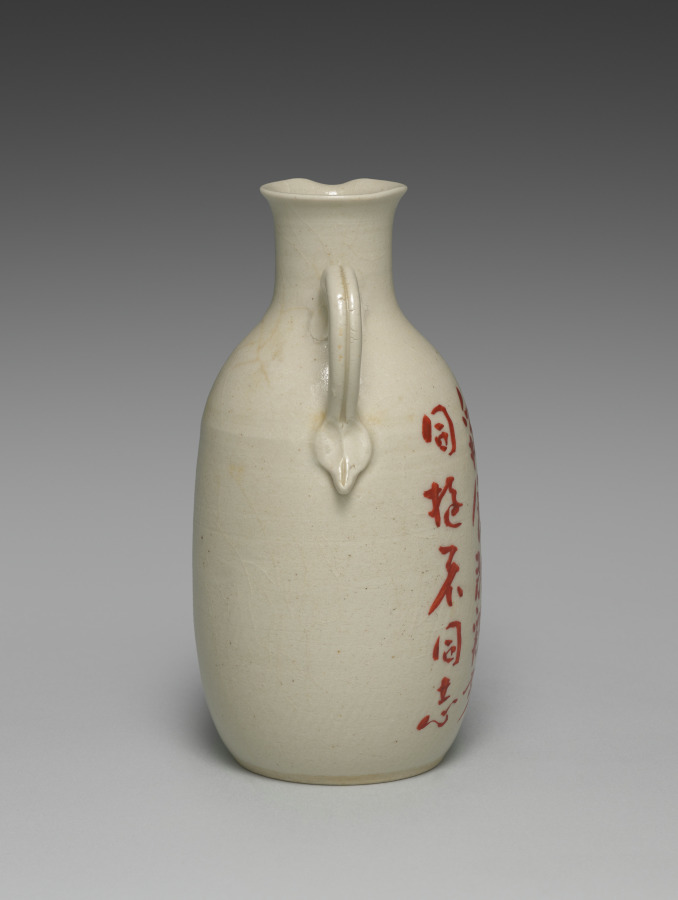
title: Crane Sake Pourer from Sake Pourers with Crane and Tortoises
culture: Japan, Meiji period (1868–1912)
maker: Seifū Yohei III (Japanese, 1851–1914)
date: 1893–1914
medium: One of a pair of sake flasks; porcelain with overglaze color enamel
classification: Ceramic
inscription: 爭食羣雞前，同遊者同志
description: This flask has a crane with a leg raised, while the other flask of this pair has stencil-like paintings of three turtles—a young one with its parents. Cranes and turtles are well-recognized symbols of longevity in East Asia, with the turtle said to live for ten thousand years and the crane for one thousand. Each flask also has a poem on the back, one in Chinese and the other in Japanese. The Chinese poem on this crane flask is two nonconsecutive five-character lines from a poem called “Crane Feelings” by the famous Tang dynasty poet Bai Juyi (772–846). One character in one of the lines has been altered. This creative poetic sampling results in a verse reading zheng shi qun ji qian, tong you zhe tong zhi 爭食羣雞前，同遊者同志. It could perhaps be translated, “before the flock of chickens competing for food, those traveling together have the same ambitions.”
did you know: This pair of seemingly humble sake pourers celebrate longevity and delight in a literary tradition that embraces multiple forms of poetic expression.